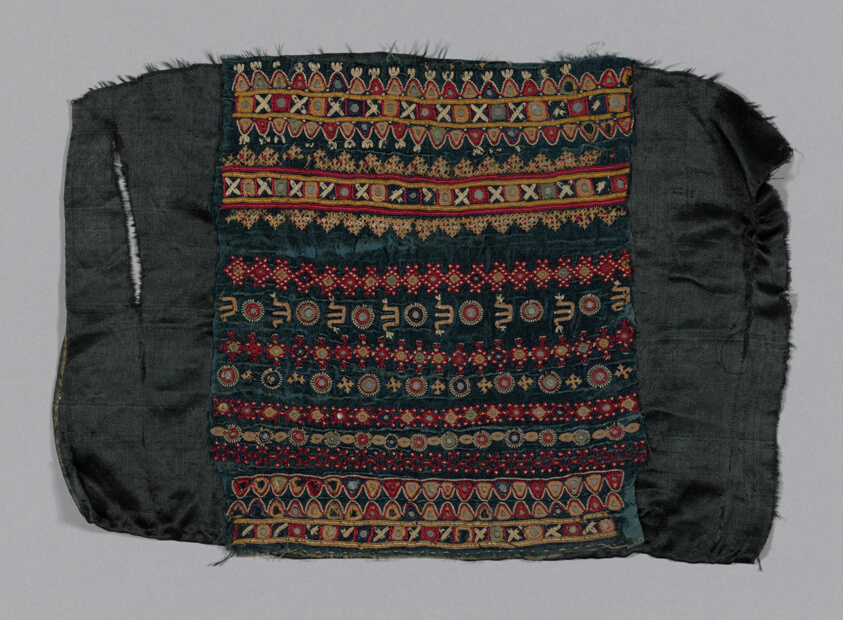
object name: Textile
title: Panel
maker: India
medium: Silk, warp-float faced 7:1 satin weave; embroidered with silk in back, chain, open chain, four-sided, Holbein, Maltese cross, Roumanian, and raised Roumanian stitches; embellished with pieces of mirror; some selvages present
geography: India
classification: textile; needlework (visual works)